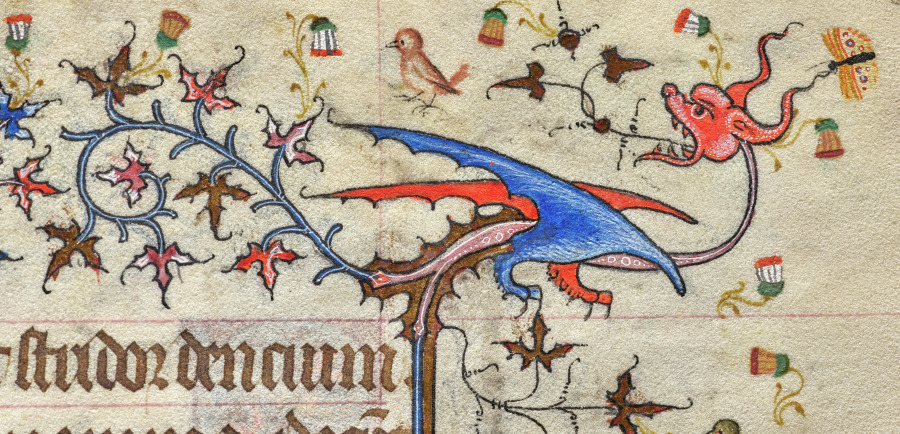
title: Hours of Charles the Noble, King of Navarre (1361-1425), fol. 320r, Text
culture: France, Paris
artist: Master of the Brussels Initials and Associates (French)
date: c. 1405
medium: ink, tempera, and gold on vellum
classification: Bound Volume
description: This precious volume was obviously highly prized by its owner, the French-born King of Navarre, who had his coat of arms painted on no less than twenty folios. Rather than directly commissioning this manuscript from a specific workshop, it seems that Charles the Noble acquired his book of hours -- perhaps ready-made for the luxury market -- while on a trip to Paris in 1404-05. A collaborative effort, six painting styles are evidenced within the pages of this codex, those of two Italians, two Frenchmen, and two Netherlanders. The painter who was responsible for the planning and decoration of the book, and who produced seventeen of the large miniatures, was a Bolognese artist known as the Master of the Brussels Initials. His principal assistant, responsible for most of the borders, was a Florentine who signed his name "Zecho" da Firenze on folio 208 verso.